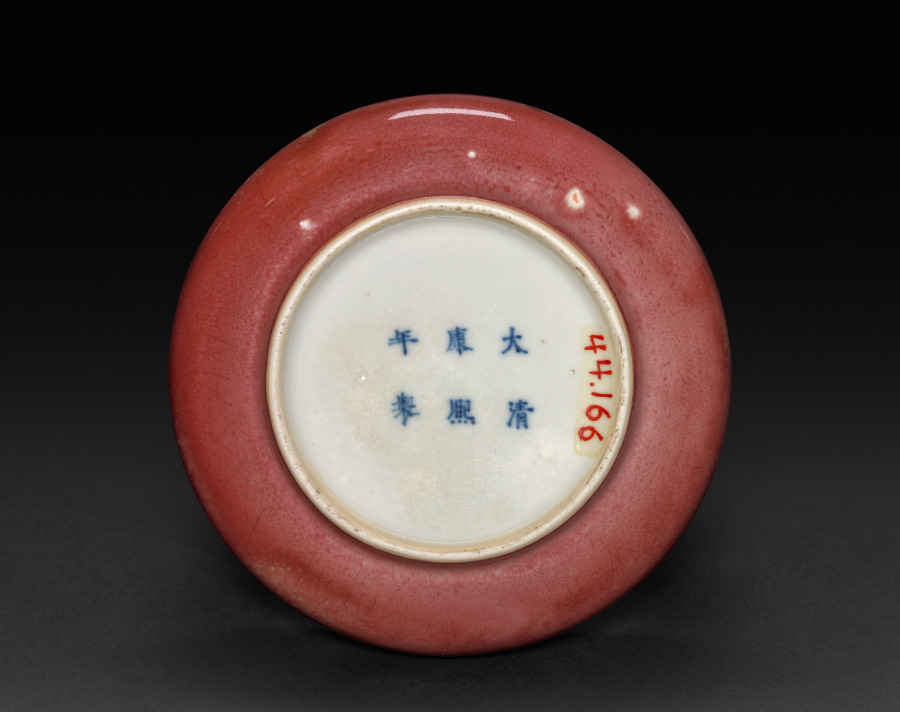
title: Gong-shaped Brush Washer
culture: China, Qing dynasty (1644-1911), Kangxi reign (1662-1722)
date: 1662–1722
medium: porcelain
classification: Ceramic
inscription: 大清康熙年製